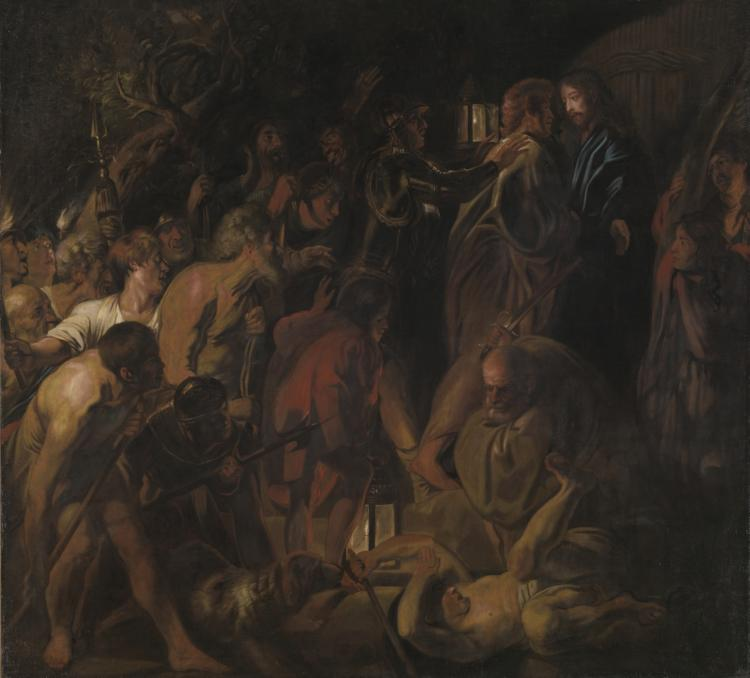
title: The Betrayal of Christ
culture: Flanders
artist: Jacob Jordaens (Flemish, 1593–1678)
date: late 1650s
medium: oil on canvas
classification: Painting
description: After the deaths of fellow Flemish painters Peter Paul Rubens in 1640 and Anthony van Dyck in 1641, Jordaens became the leading painter in his native Antwerp. In the seventeenth century, Antwerp underwent a Catholic Restoration, leading to numerous commissions for religious paintings. Jordaens's large work depicts the moment, set in the Garden of Gethsemane, in which Judas betrays Christ with a kiss, leading to the arrest of Jesus by Roman soldiers. The tense moment of betrayal is compounded by the violent reaction of apostle Peter in the foreground, who attacks Malchus, the servant of the High Priest who led the arrest. The lighting heightens the drama of the Passion of Christ, as the lanterns of the soldiers powerfully illuminate the night scene. Night scenes, also called nocturnes, are trademarks of the Northern painting tradition since the fifteenth century and demonstrate its continuing impact into the 1600s.